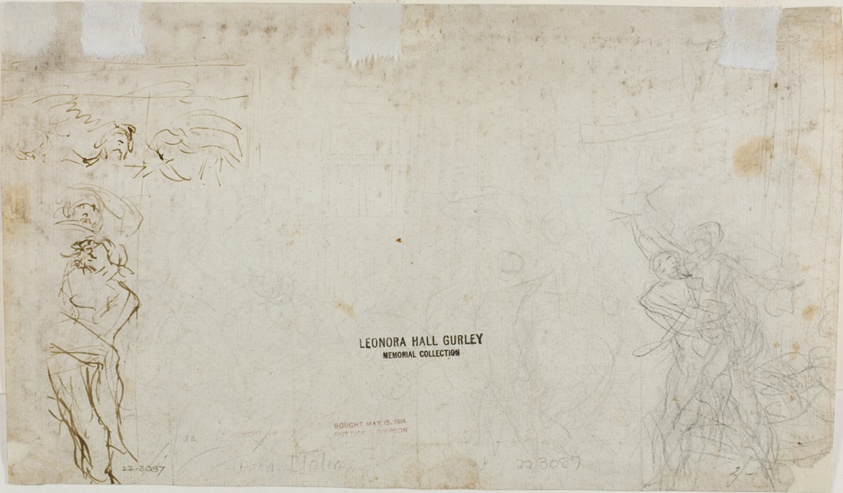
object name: Drawing and Watercolor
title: Massacre of the Innocents (recto); Figure Sketches (verso)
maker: School of Nicolas Poussin (French, 1594-1665)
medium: Pen and brown ink, with brush and brown wash, (recto), and graphite and pen and brown ink (verso), on ivory laid paper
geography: France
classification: pen and ink drawings; drawings (visual works); prints and drawing